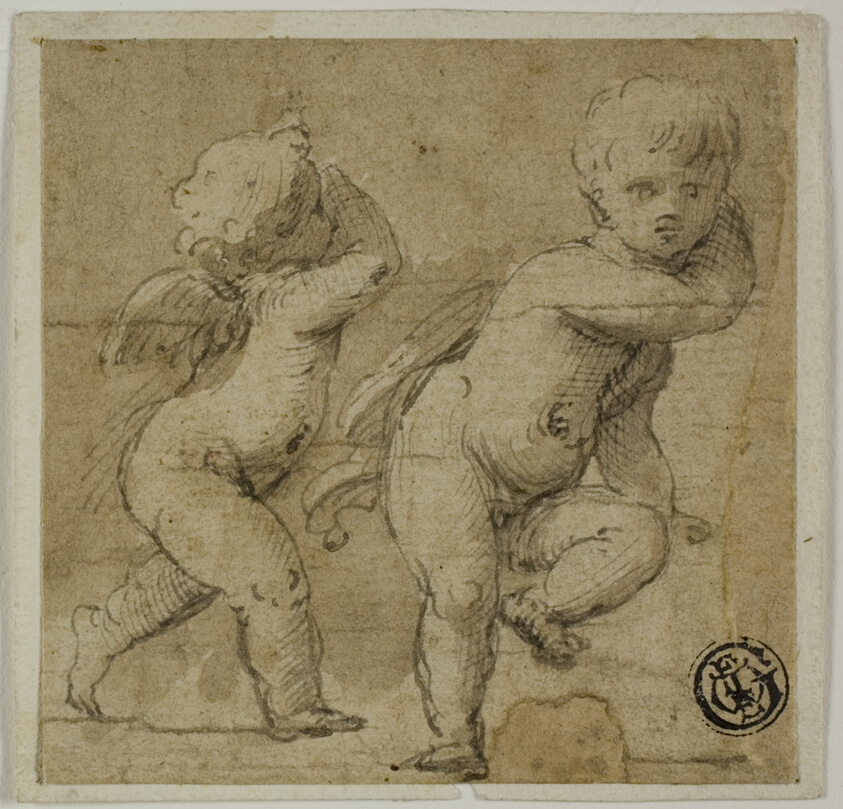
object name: Drawing and Watercolor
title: Two Putti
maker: Follower of Francesco Mazzola, called Parmigianino; Italian, 1503-1540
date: c. 1590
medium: Pen and brown ink with brush and brown wash, on tan laid paper, laid down on ivory laid paper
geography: Italy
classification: ink with wash; drawings (visual works); prints and drawing